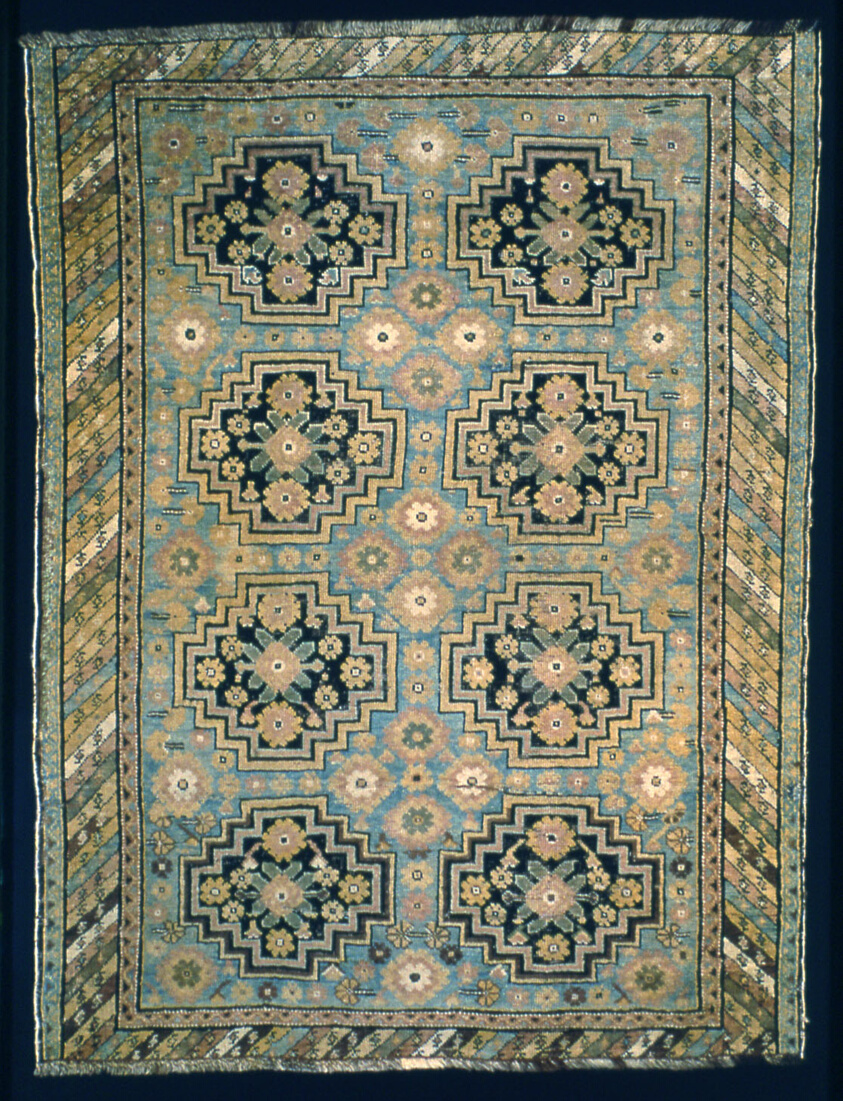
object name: Textile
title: Carpet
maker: Caucasus, Shirvan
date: 1875/1900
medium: Wool and cotton, plain weave with supplementary wrapping wefts forming cut pile through a technique known as "Ghiordes knots"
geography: Caucasus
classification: weaving - carpet; textile